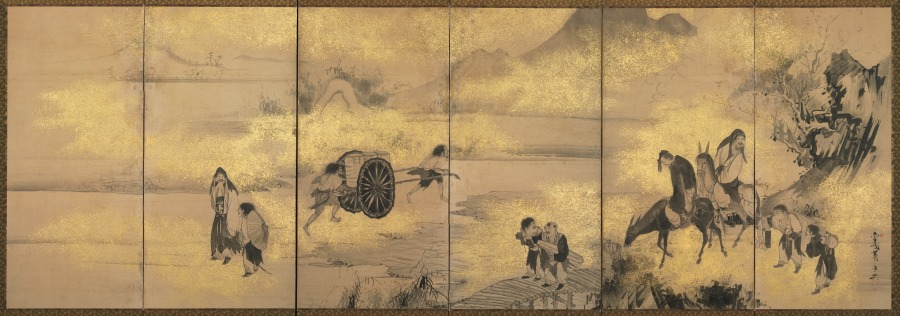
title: The Eight Immortals of the Wine Cup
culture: Japan, Edo period (1615–1868)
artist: Soga Shōhaku (Japanese, 1730–1781)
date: later 1700s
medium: pair of six-panel folding screens, ink and cut-gold foil on paper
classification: Painting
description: Responding to the desires of the middle class (chonin), some late Edo period Japanese painters moved away from the seriousness associated with the Chinese theme of reclusion, focusing instead on the motif’s humorous aspects. The theme Eight Immortals of the Wine Cup is based on a poem by the renowned 8th-century Chinese poet Du Fu about his eight colleagues. These scholars eagerly sought release from their official governmental duties and then supposedly fled the capital for the countryside. There, they engaged in wildly eccentric behavior and adventurous creative work, all fueled by copious amounts of wine. Shohaku’s version of events exaggerates the scholars’ pleasure, as seen in their comical facial expressions.